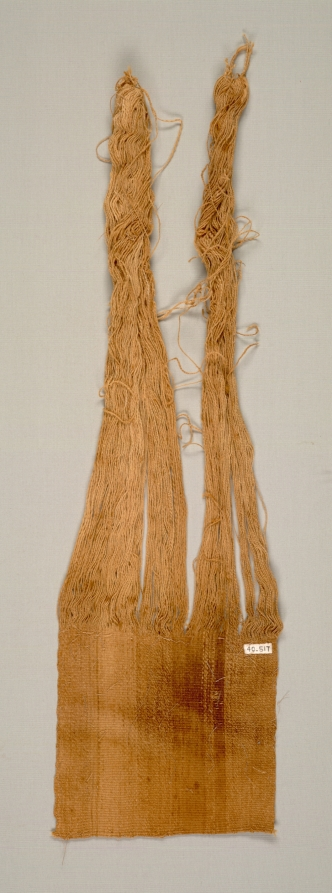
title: Mummy Bundle "Mask"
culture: Peru, South Coast, Ica Valley, Ocucaje site, Paracas style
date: 200 BCE–1 CE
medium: plain warp-faced cloth, painted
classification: Textile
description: The Paracas people buried their dead in pear-shaped mummy bundles, created by carefully wrapping the seated human body in layers of garments and other textiles. Sometimes a painted cloth was placed on the outer layer at the top of the bundle, as though it served as the bundle’s face, head, or “mask.” Some cloths were painted with masklike faces, although others—such as this example—feature complete figures, which may be mythological beings with supernatural appendages.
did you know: These masks fall into two categories, those with only a face and those with a full-bodied figure.